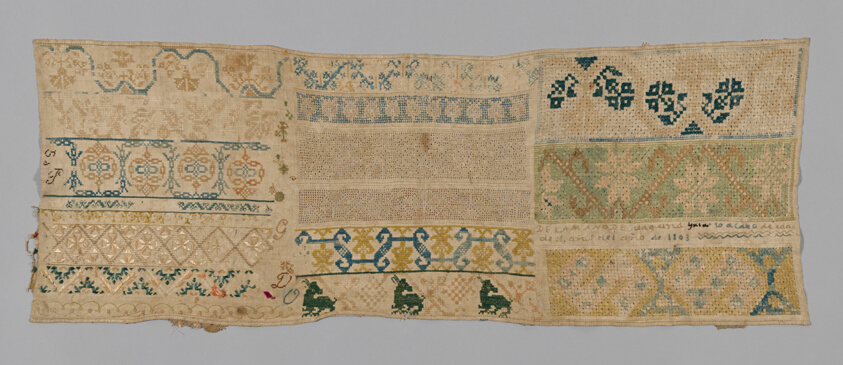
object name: Textile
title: Sampler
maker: Mexico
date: 1803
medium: linen, tabby weave, embroidered in silk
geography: Mexico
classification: textile; needlework (visual works); sampler; weaving